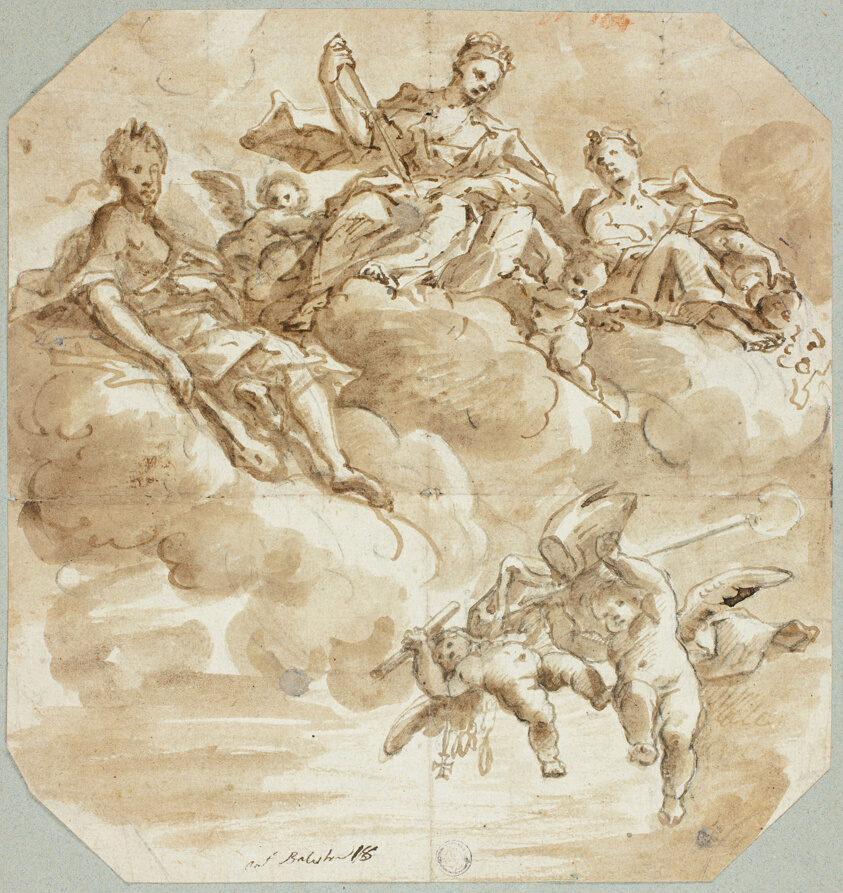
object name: Drawing and Watercolor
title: Mary as Queen of Heaven or Apotheosis of Saint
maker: Attributed to Antonio Balestra; Italian, 1666-1740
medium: Brush and brown ink and wash, possibly over charcoal, on ivory laid paper, laid down on blue wove paper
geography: Italy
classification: drawings (visual works); prints and drawing